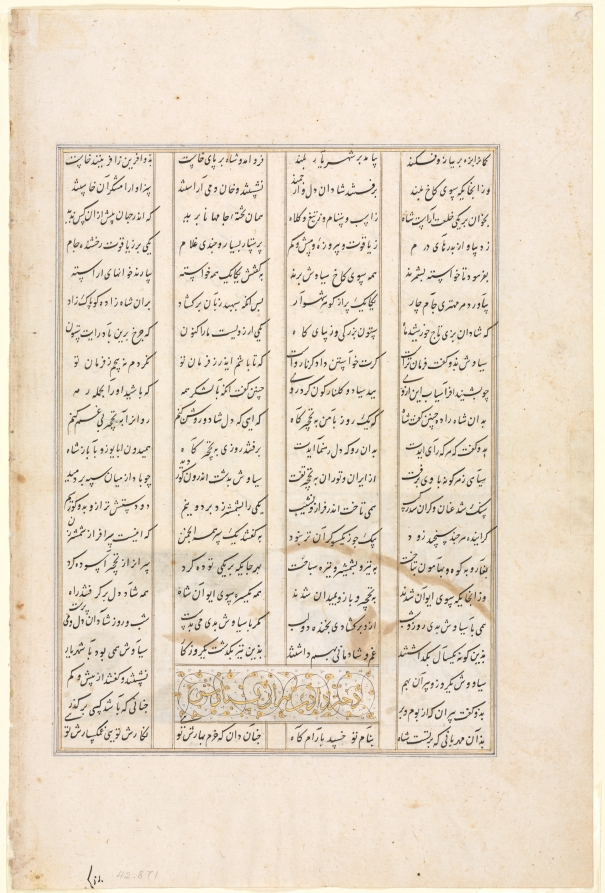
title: Persian verses (verso) from a Shahnama (Book of Kings) of Firdausi (940-1019 or 1025)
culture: Iran, Shiraz, Timurid period (1370-1501)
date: late 1400s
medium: opaque watercolor, ink, and gold on paper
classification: Manuscript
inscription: script: Nasta'liq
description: A prince from Iran’s early legendary history, Siyavush was sent by his father, the shah, to train under the great warrior Rustam in the arts of hunting, archery, and horseback riding. In the painting on the other side of this page, Siyavush demonstrates his considerable skill by hitting the bulls eye on a rolling target from horseback. The gold sky, pastel ground with grassy tufts, and dense leafy riverbank are distinctive features of Persian painting during this period.